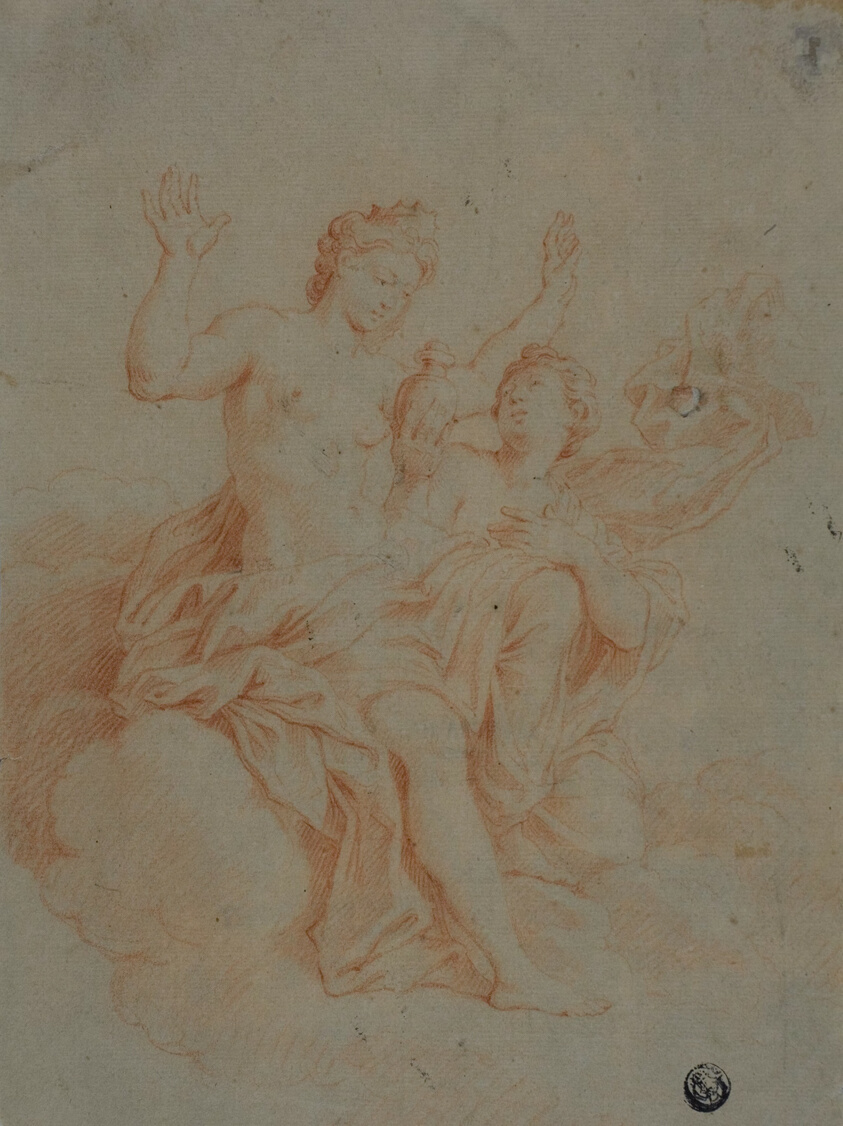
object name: Drawing and Watercolor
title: Psyche Presenting the Phial of Water to Venus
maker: After Raffaello Sanzio, called Raphael; Italian, 1483-1520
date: 18th century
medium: Red chalk, with traces of graphite, on cream laid paper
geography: Italy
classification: chalk; drawings (visual works); prints and drawing